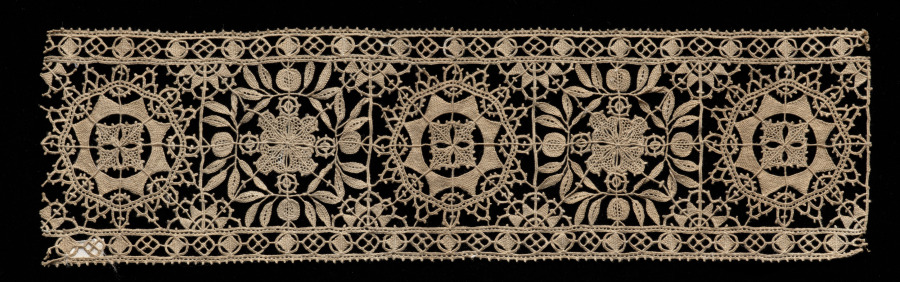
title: Lace Band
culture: Italy, 1800s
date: 1800s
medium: Linen: needle lace (Reticella)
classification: Lace